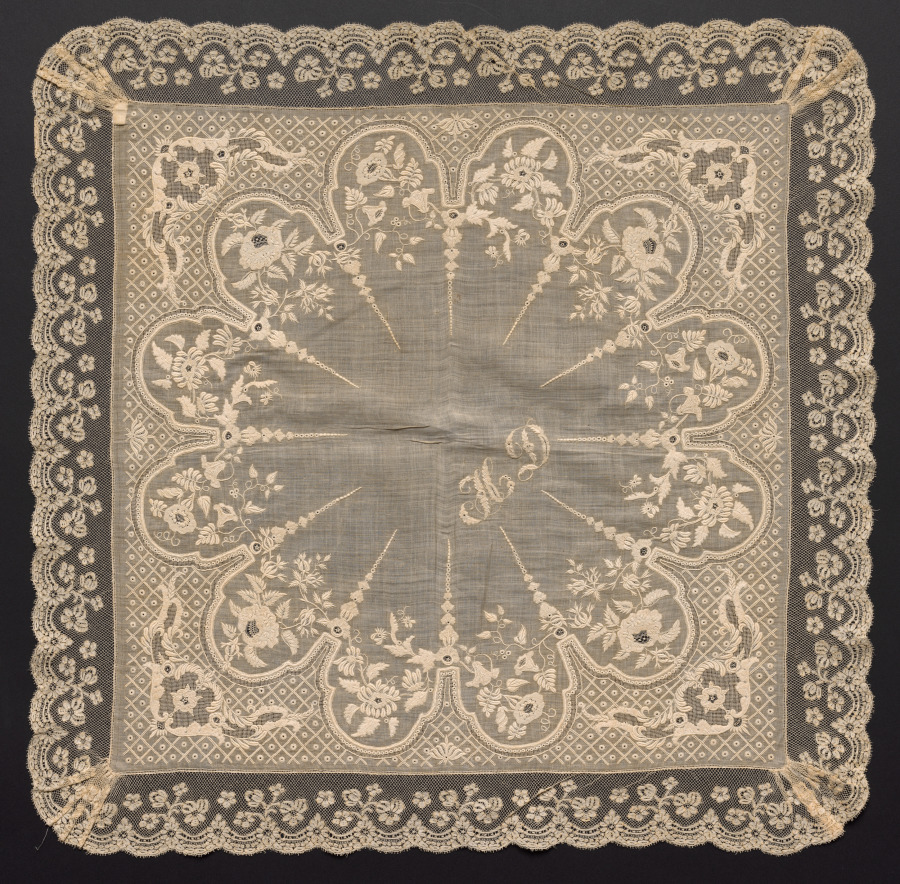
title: Lace Handkerchief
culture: France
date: 1800s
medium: Plain weave linen center: needle lace (drawnwork), bobbin lace (Valenciennes lace) edging, and embroidery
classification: Embroidery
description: The initials H. D. are embroidered in the center of this handkerchief.